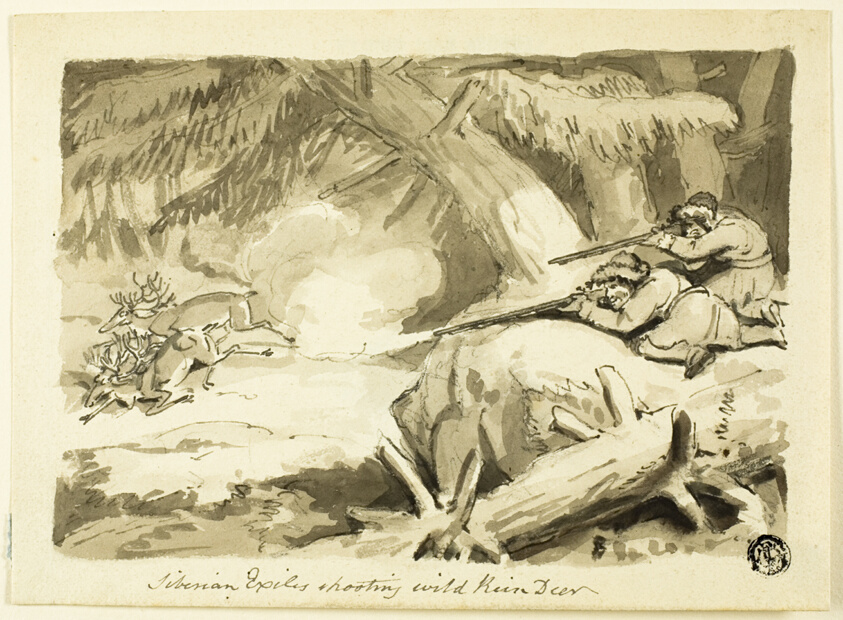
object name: Drawing and Watercolor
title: Siberian Exiles Shooting Wild Reindeer (recto); Shell (verso)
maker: Recto attributed to Samuel Howett (English, c. 1765-1822); Verso by Unkown Artist (British, 19th century)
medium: Pen and black ink, with brush and gray and brown wash, over graphite (recto), and print (verso), on ivory wove paper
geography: England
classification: ink or chalk wash; drawings (visual works); prints and drawing